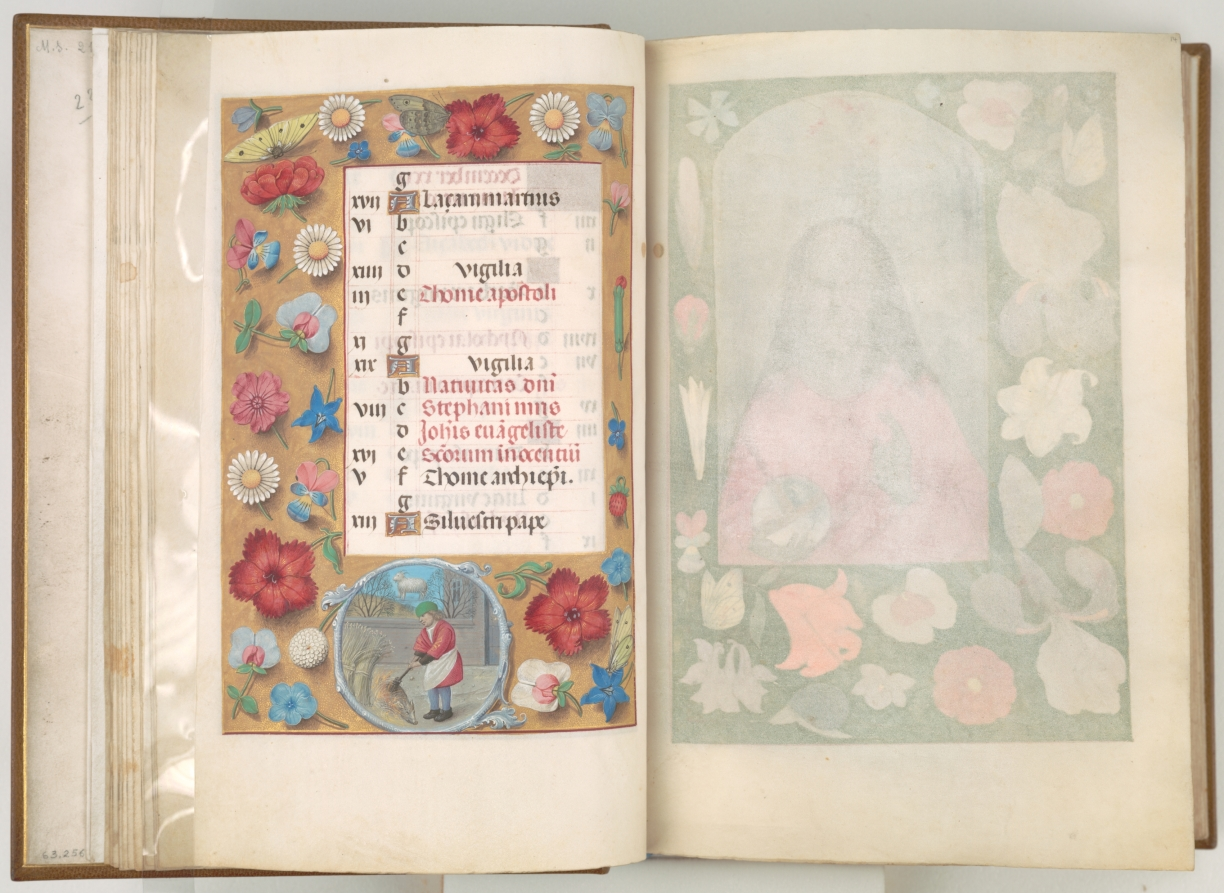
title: Hours of Queen Isabella the Catholic, Queen of Spain: Fol. 14r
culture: Flanders, Ghent and Bruges, late 15th century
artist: Master of the First Prayerbook of Maximillian (Flemish, c. 1444–1519)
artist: and Associates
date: c. 1500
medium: ink, tempera, and gold on vellum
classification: Bound Volume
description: This manuscript was illuminated by a circle of at least five highly organized manuscript painters active in the Flemish cities of Ghent and Bruges. The principal illuminator was Alexander Bening, who painted the majority of the book's miniatures. Manuscripts produced by this circle of artists are renowned for the decoration of their borders, which typically feature a rich variety of realistically-painted flowers, birds, and butterflies. This prayer book, called a book of hours, was intended not for a cleric, but for the private devotions of a lay person-in this case, Isabella the Catholic, Queen of Spain (1451-1504). Isabella's coat of arms embellishes the book's frontispiece. It is unlikely that the book was commissioned by the Queen herself; rather, she probably received it as a diplomatic gift from someone courting her patronage, perhaps Cardinal Francisco Jimenez de Cisneros. A Franciscan friar, Jimenez was dependent upon Isabella for his advancement, first to the post of Queen's confessor in 1492, and then to Archbishop of Toledo in 1495.